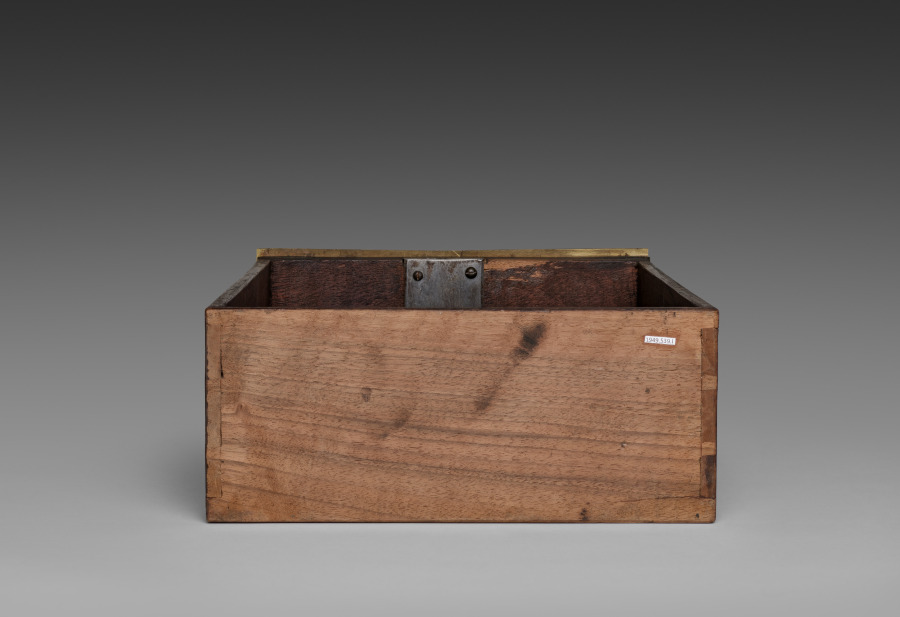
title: Side Drawer for Cabinet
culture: France, late 17th Century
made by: André-Charles Boulle (French, 1642–1732)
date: c. 1690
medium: ebony, marquetry in metal and tortoise shell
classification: Furniture and woodwork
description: Appointed cabinetmaker to King Louis XIV in 1672, André-Charles Boulle became a master of furniture making in France during the late 1600s until his death in 1732. Known primarily for his use of marquetry, in which metal patterns are inlaid into tortoiseshell then applied within the veneered surface of the furniture, Boulle established a level of quality and craftsmanship few others could achieve. As a result, his work found favor at the royal court and among other aristocrats and diplomats eager to impress the king. The inclusion of a medallion depicting Louis XIV within the bronze decoration of this chest would have identified the owner with the royal court. Often exhibiting stout architectural proportions with elegant groups of inlaid motifs such as the parrot on the central panel of this chest, Boulle’s designs are an example of the intellectual fashion for contrasting ideas, materials, and motifs.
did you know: Originally designed to sit atop an elaborate tall stand, this chest was likely altered in the late 1700s to reduce its scale and height.